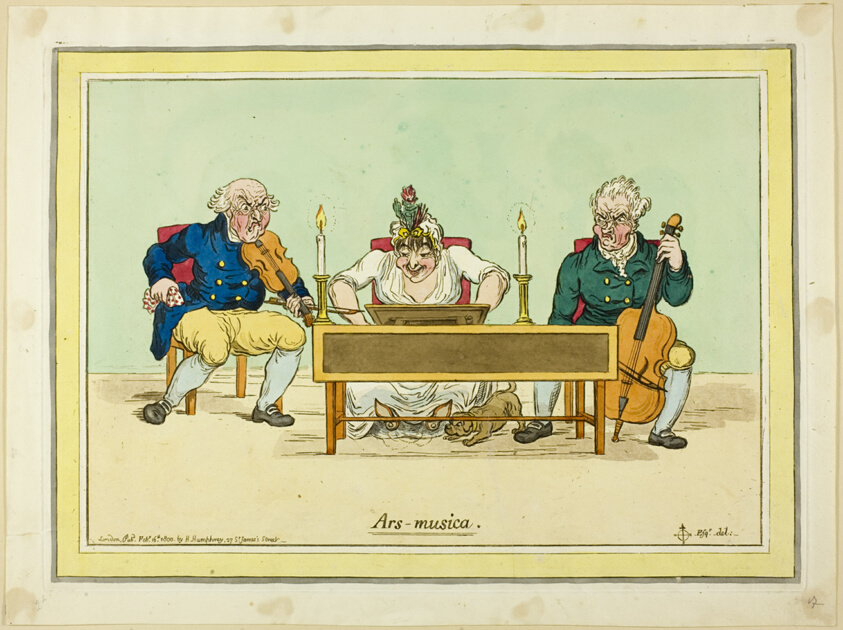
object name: Print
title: Ars musica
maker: James Gillray (English, 1756-1815); after Brownlow North (English, 1778-1829)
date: published February 16, 1800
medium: Hand-colored etching on paper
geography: England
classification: etching; print; prints and drawing